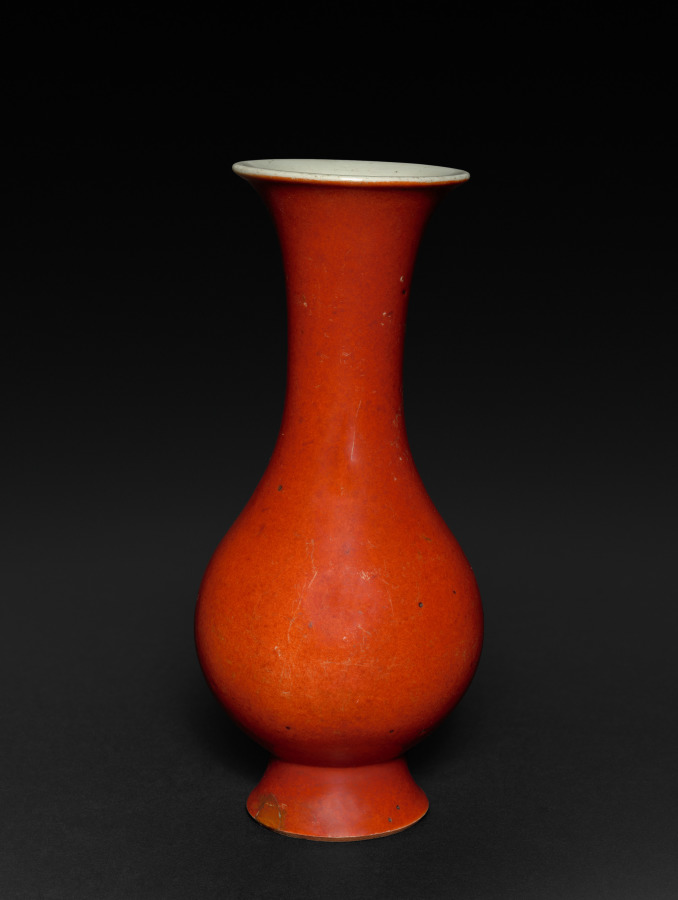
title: Vase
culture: China, Jiangxi Province, Jingdezhen kilns, Qing dynasty (1644–1911), Yongzheng reign (1722–35)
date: 1723–35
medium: porcelain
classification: Ceramic